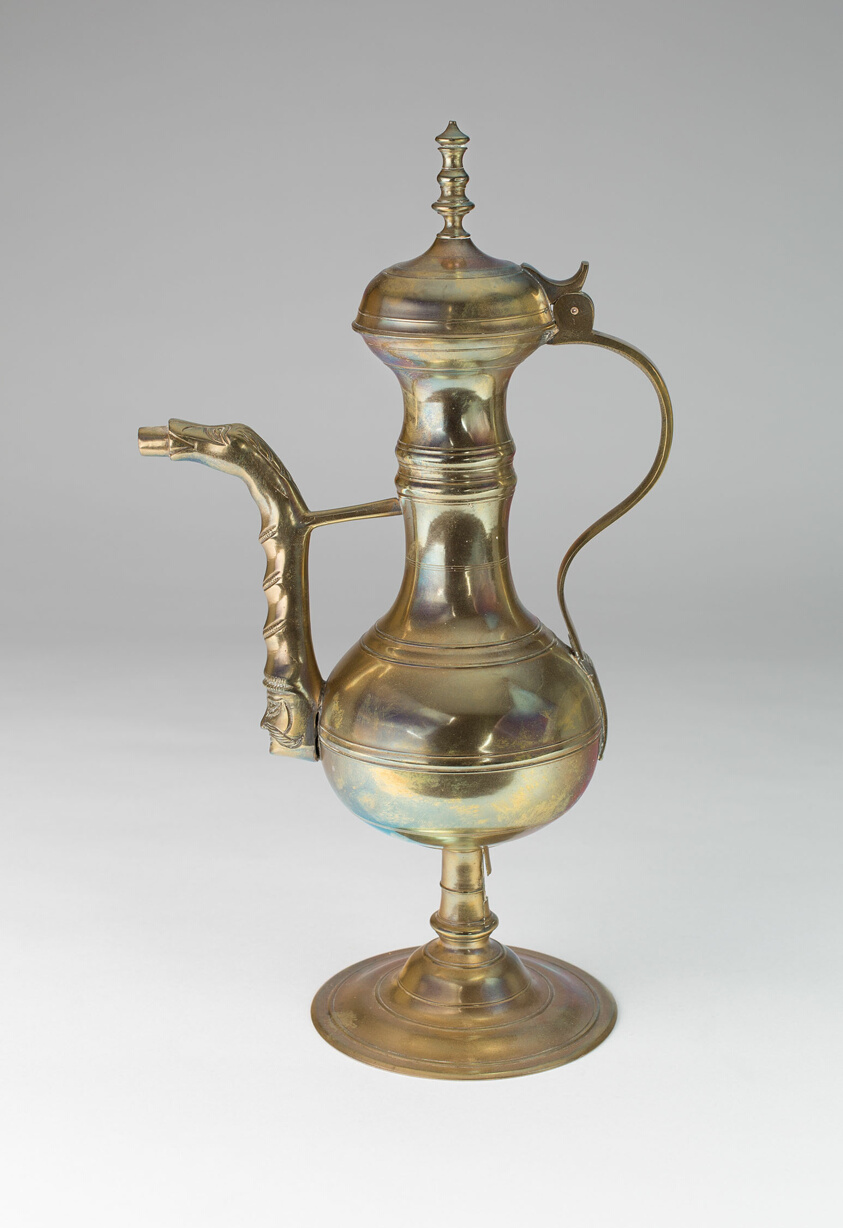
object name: Decorative Arts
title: Ewer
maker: European, Probably Neatherlands or Germany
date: 1850/1900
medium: Brass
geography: Dinant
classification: bronze; metalwork; european decorative arts; decorative arts